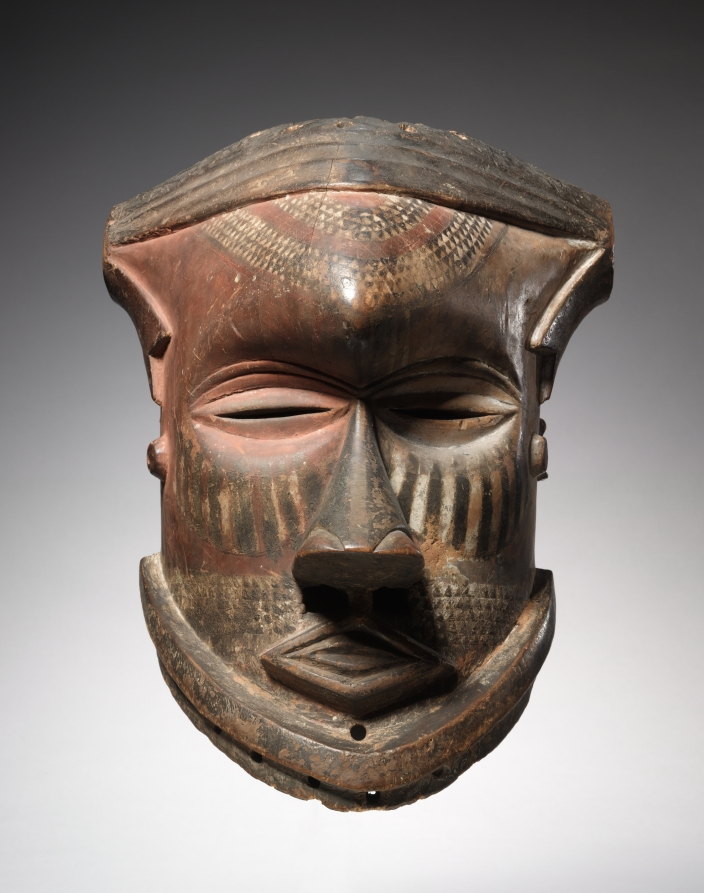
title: Mask (Bwoom)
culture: Africa, Central Africa, Democratic Republic of Congo, Kuba-style carver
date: mid- to late 1800s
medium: Wood and paint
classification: Mask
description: Among the Bushoong, the central Kuba group, the mask known as bwoom—most typically identified as the head of a hunter-gatherer—forms a triad with a female mask and another male mask. All three are protagonists in the reenactment of the foundation of the Kuba kingdom. Outside the capital, however, bwoom appears in different non-royal contexts, such as the men’s initiation society.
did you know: Imagine this mask topped with eagle feathers; they would have been added only on special occasions when it was performed.